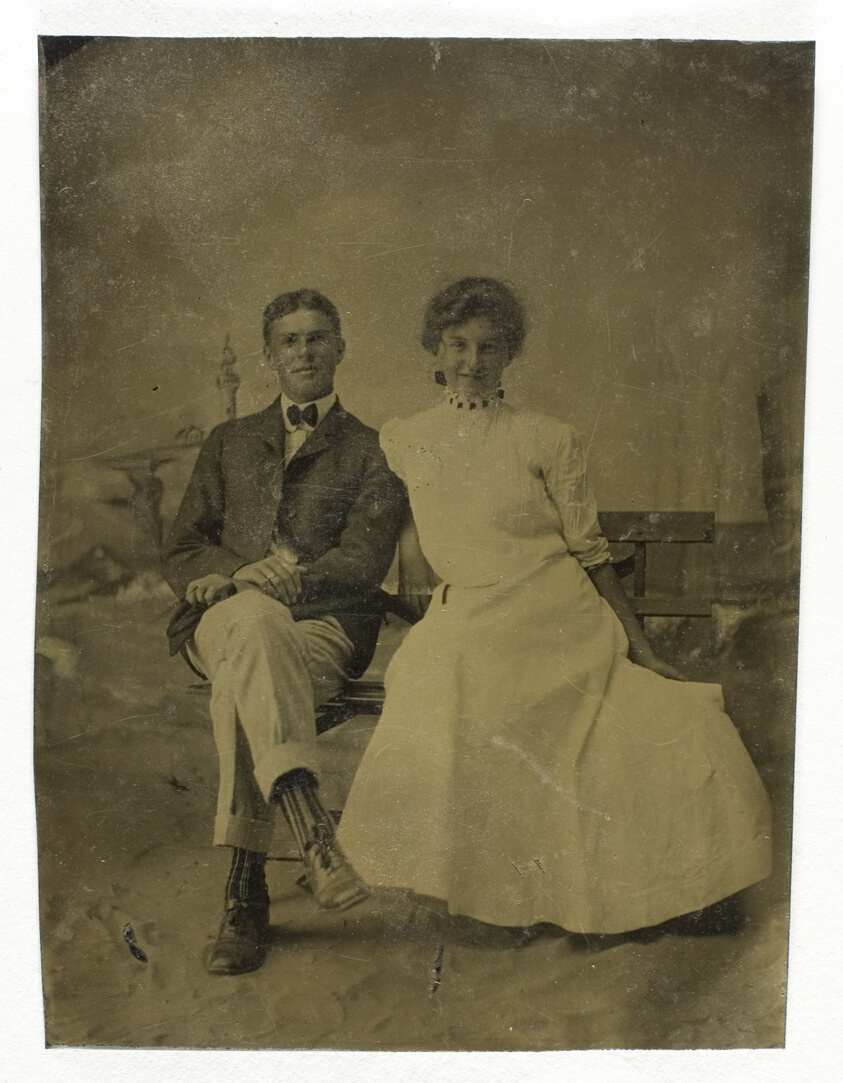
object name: Photograph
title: Untitled (Portrait of Seated Man and Woman)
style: 19th century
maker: Artist unknown; 19th century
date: 1850/99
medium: Tintype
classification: photography; photograph